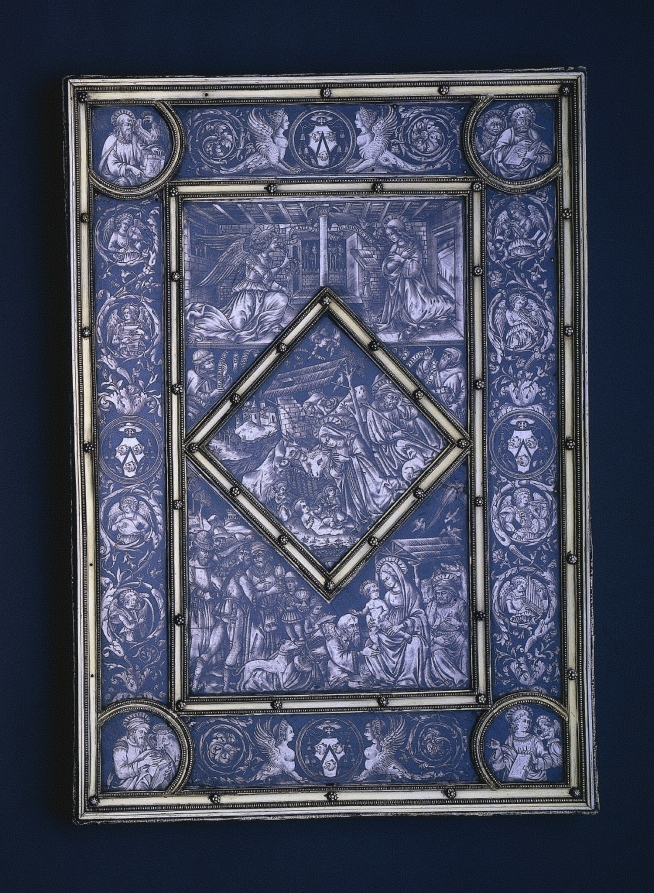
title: Front Cover for a Gospel Book of French Cardinal Jean La Balou (1421-1491)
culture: Italy, Florence, 15th century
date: c. 1467–68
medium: nielloed silver plaques within gilt-silver borders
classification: Metalwork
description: Scenes from Christ’s infancy decorate this cover that once adorned the front of a gospel book. It is made up of a series of silver plaques held together by gilt-silver borders. The plaques are engraved, and the resulting fine lines or depressions have been filled with a silver sulfide alloy, lustrous black in color, in a technique called niello. It is one of the finest examples of this decorative technique for which Florence was renowned in the 15th century. This cover and its manuscript once belonged to the French cardinal, Jean La Balou, who was jailed in 1469. He presented his gospel book to Pope Paul II as a gift, perhaps in the hope of receiving his freedom. The gospel book, of which its two covers have survived (the back cover is in the Minneapolis Institute of Arts), remained in the papal apartments until the end of the 18th century, perhaps leaving when Napoleon’s troops held the Vatican.